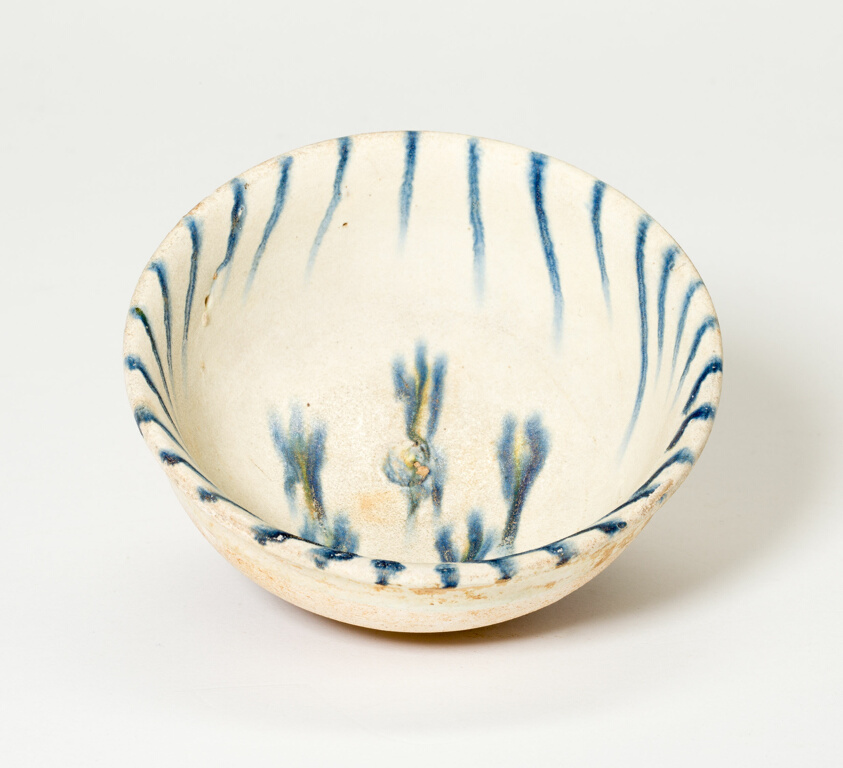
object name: Vessel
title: Cup with Streaks and Stylized Floret Patterns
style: Chinese (culture or style)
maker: China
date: Tang dynasty (618–906), 8th century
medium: Slip-coated earthenware with cobalt blue and lead amber streaks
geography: China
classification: drinking vessel; earthenware; asian art; ceramics; vessel